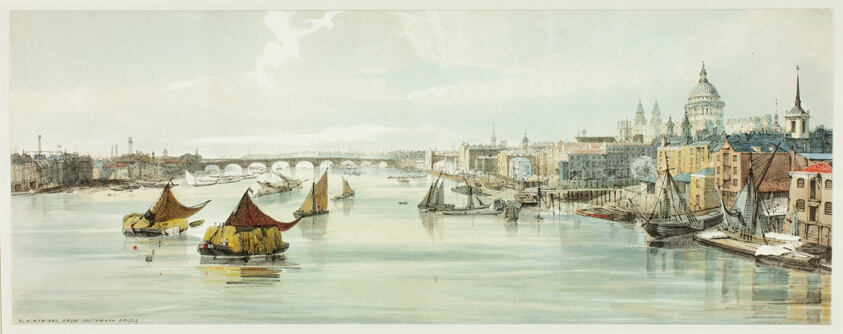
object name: Print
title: Blackfriars, from Southwark Bridge, plate six from Original Views of London as It Is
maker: Thomas Shotter Boys (English, 1803-1874); designed by Charles Ollier (English, 1788-1859)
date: 1842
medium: Hand-colored lithograph on paper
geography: England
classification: lithograph; print; prints and drawing